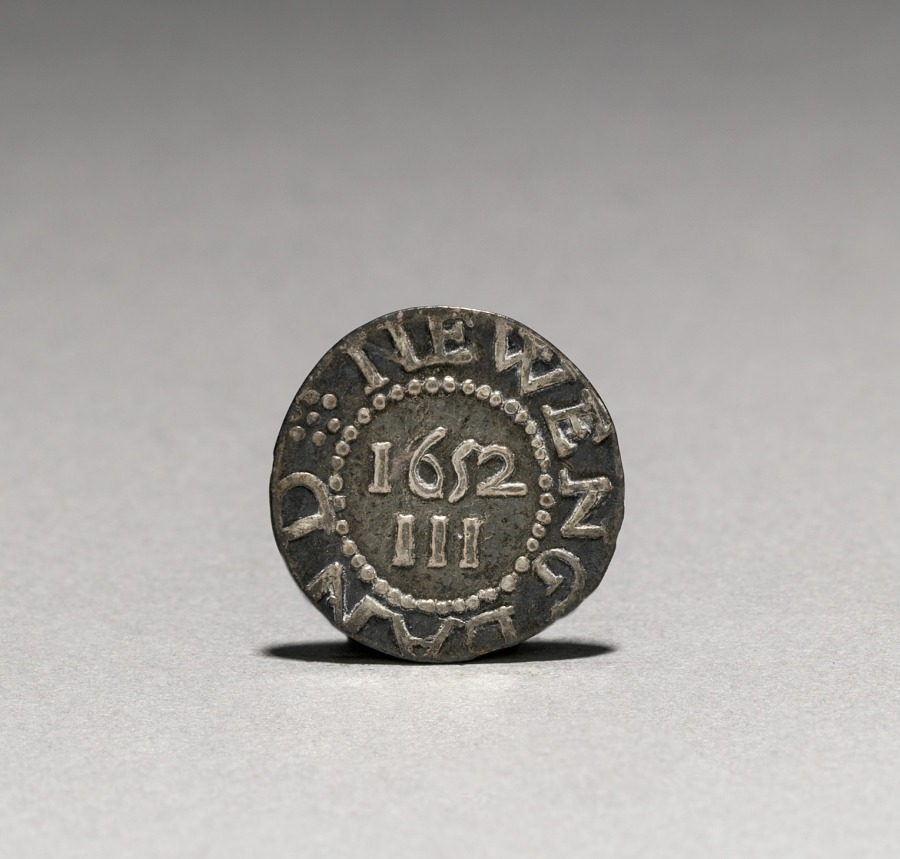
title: Pine Tree Three Pence (reverse)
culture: America, Massachusetts, Boston, 17th century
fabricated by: John Hull (American, 1624–1683)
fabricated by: Robert Sanderson (American, 1609–1693)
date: 1652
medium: silver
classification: Coins